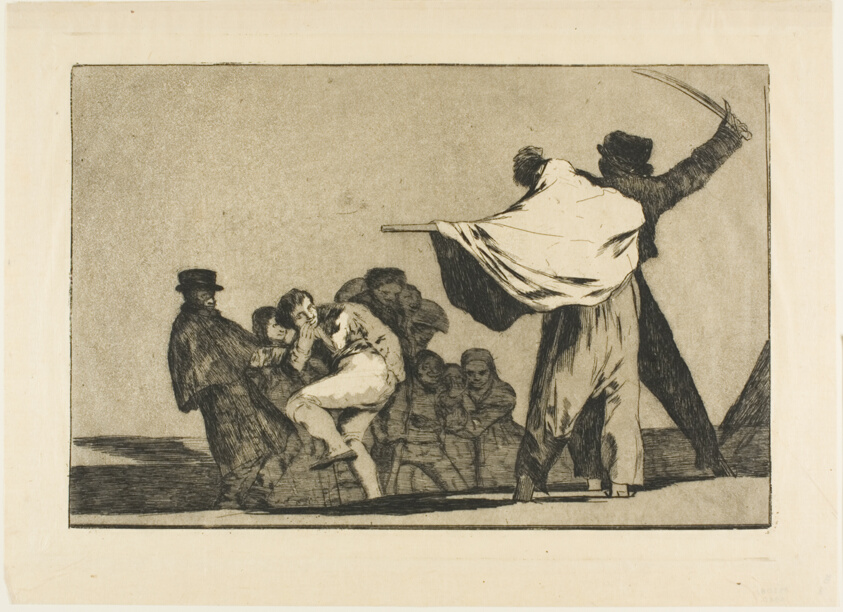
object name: Print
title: If Two to One, Stuff Your Arse with Straw, from Los Proverbios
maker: Francisco José de Goya y Lucientes (Spanish, 1746-1828)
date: 1815/24, published 1877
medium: Etching and burnished aquatint on Japanese paper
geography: Spain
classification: etching; print; prints and drawing